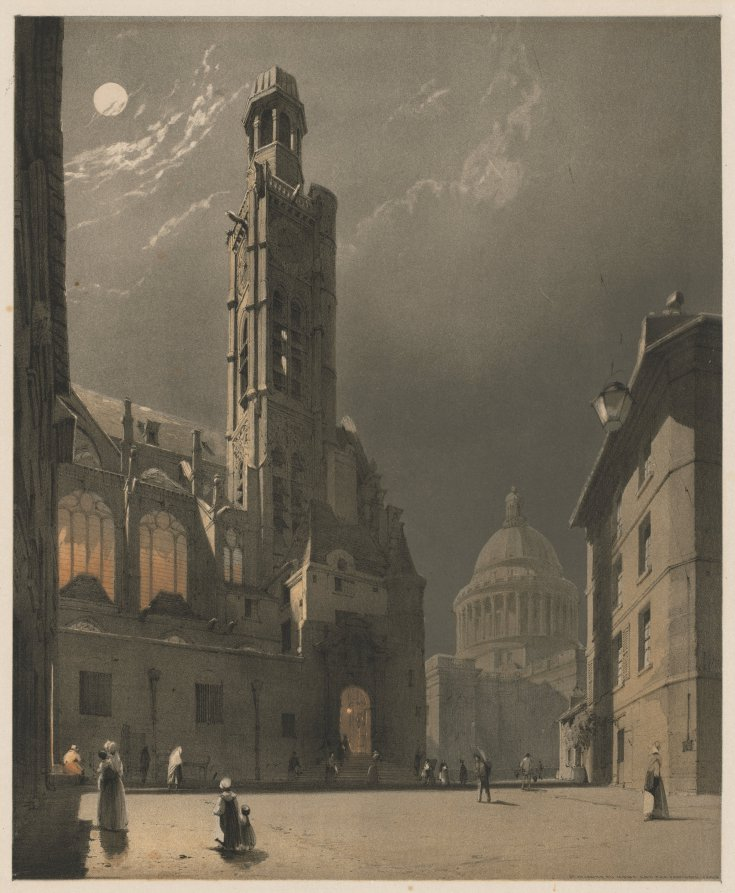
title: Picturesque Architecture in Paris, Ghent, Antwerp, Rouen: St. Etienne du Mont and the Pantheon, Paris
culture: England, 19th century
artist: Thomas Shotter Boys (British, 1803–1874)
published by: Charles Joseph Hullmandel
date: 1839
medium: color lithograph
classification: Print